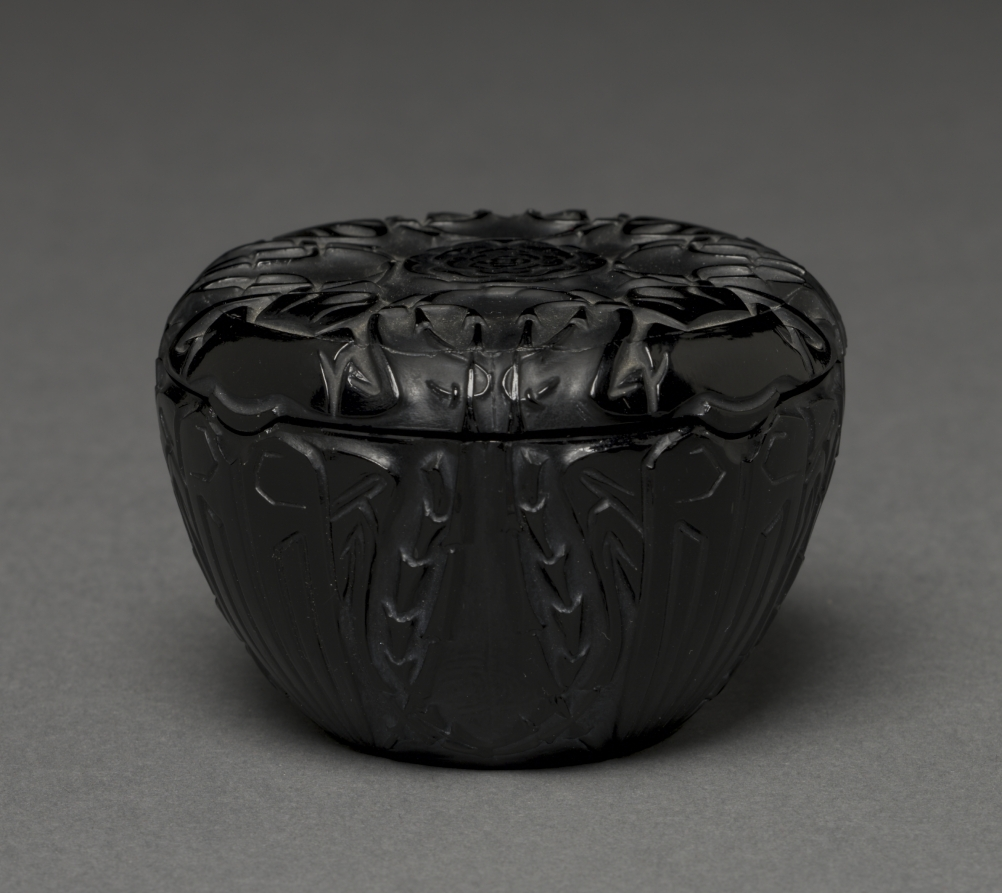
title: Covered Container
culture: France, 20th century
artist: firm of René Lalique (French, 1860–1945)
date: c. 1914–1930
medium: glass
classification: Glass